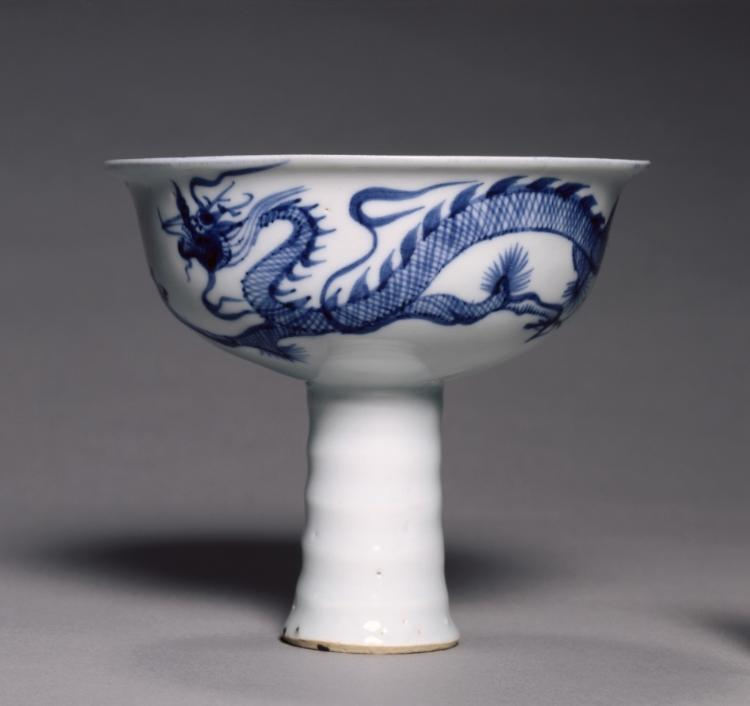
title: Stem Cup with Dragon Pursuing Flaming Jewel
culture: China, Jiangxi Province, Jingdezhen kilns, Yuan dynasty (1271–1368)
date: 1300s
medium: porcelain with underglaze cobalt blue and molded decoration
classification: Ceramic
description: The stem cup as a porcelain vessel shape was introduced to China by the Mongols from Northeast Asia when they ruled the country in the 14th century.